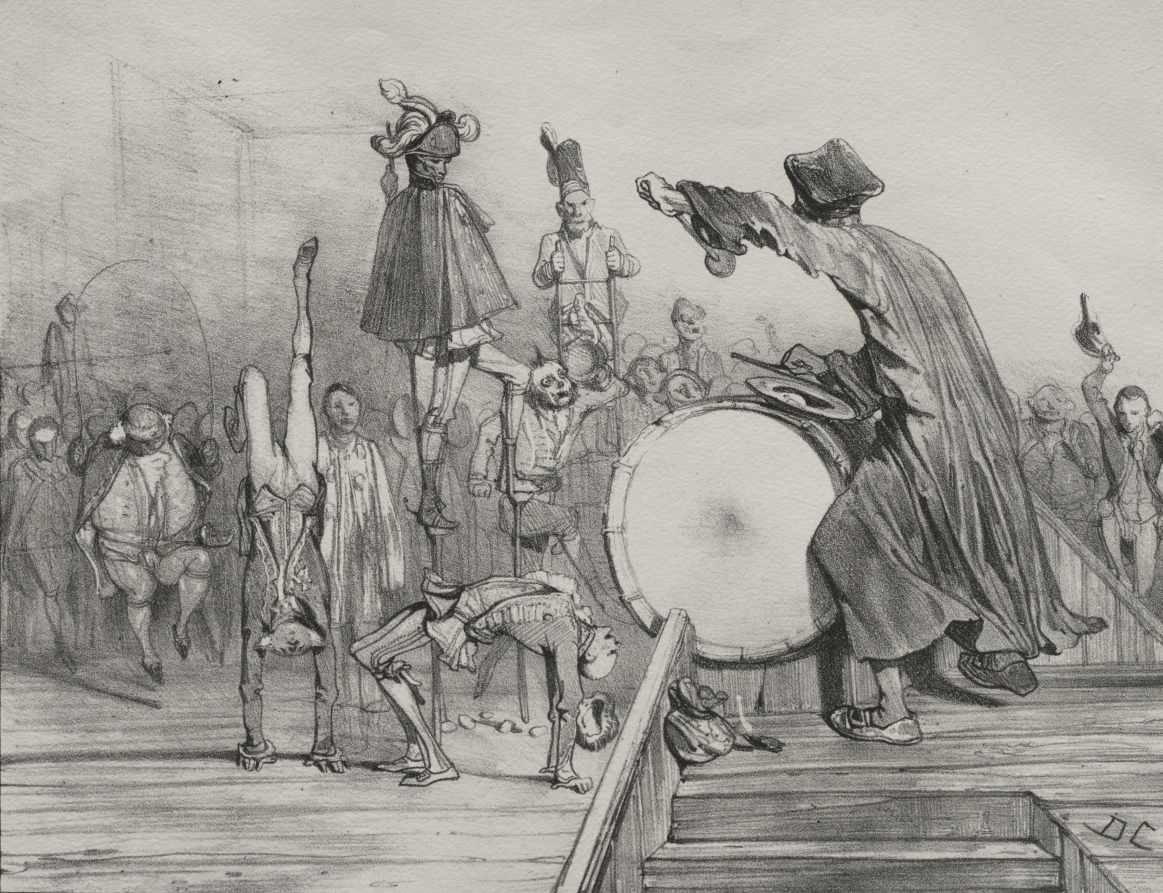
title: Great Tumbler!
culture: France, 19th century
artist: Alexandre-Gabriel Decamps (French, 1803–1860)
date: 1830–1831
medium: lithograph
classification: Print